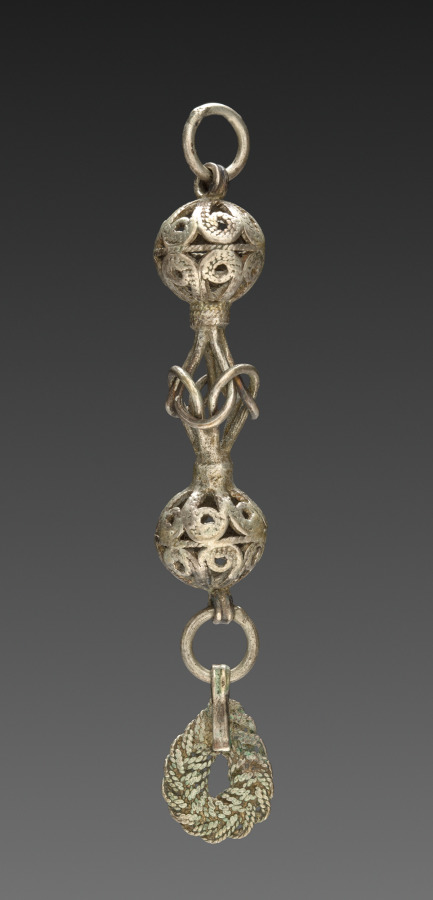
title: Button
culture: Balkans, 19th century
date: 1800s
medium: silver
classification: Jewelry